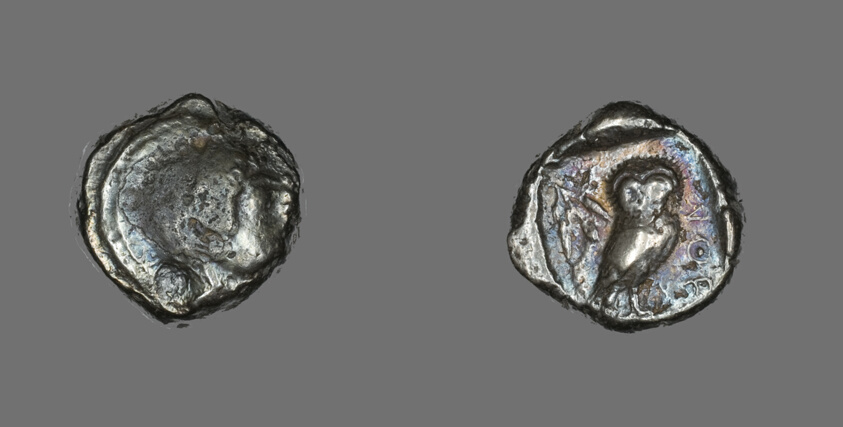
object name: Coin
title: Tetradrachm (Coin) Depicting the Goddess Athena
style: greek, ancient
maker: Greek, minted in Athens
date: before 490 BCE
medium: Silver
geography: Greater Athens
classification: coin; ancient art